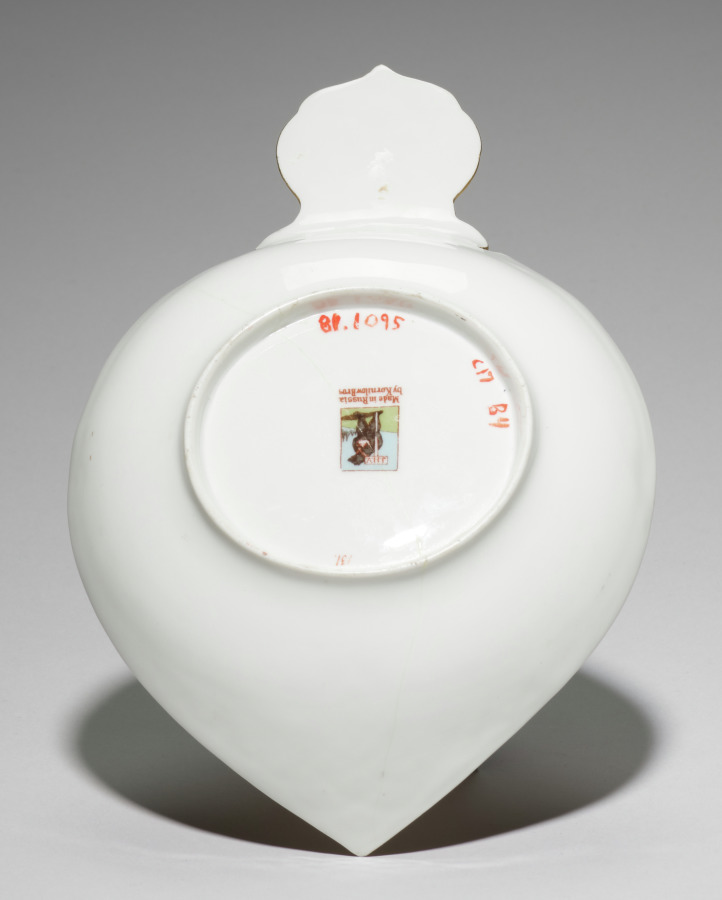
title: Cup (Kovsh)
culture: Russia, St. Petersburg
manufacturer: Kornilov Brothers (Russian, established 1835)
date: 1893–1917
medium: porcelain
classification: Ceramic